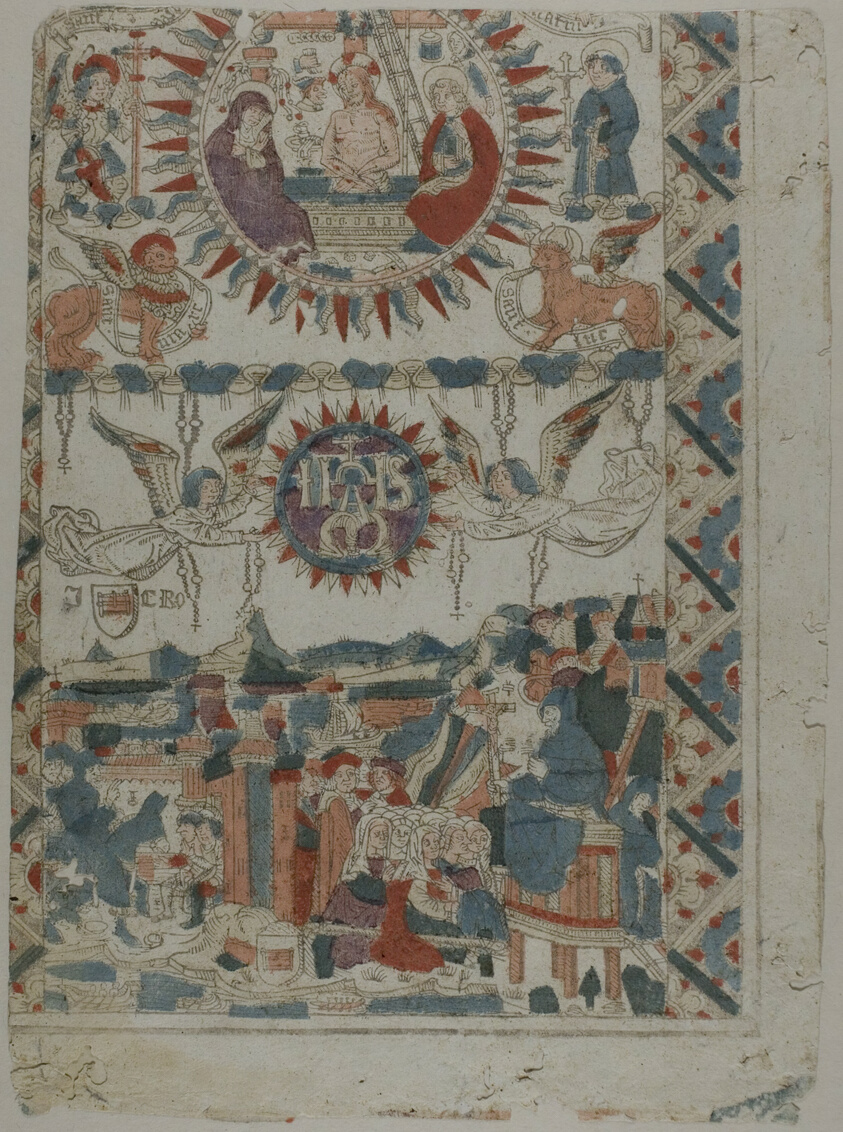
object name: Print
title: The Arrival in France of Saint Francis of Paola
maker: Artist unknown; French (Toulouse), active c. 1495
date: c. 1495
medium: Woodcut in gray, hand-colored with brush, stencil and watercolor on ivory laid paper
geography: France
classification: woodcut; prints and drawing; print; manuscript; stencil